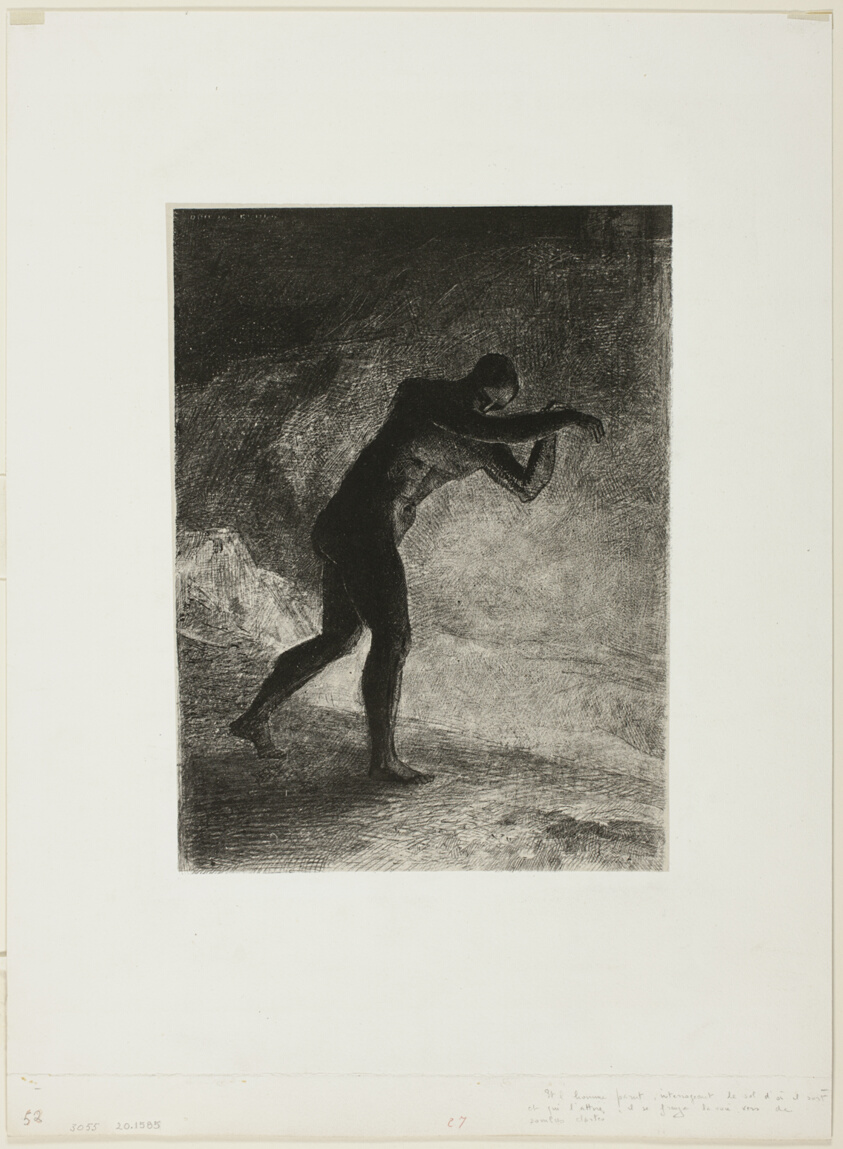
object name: Print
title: And Man Appeared; Questioning the Earth From Which He Emerged and Which Attracted Him, He Made His Way Toward Somber Brightness, plate 8 of 8 from "Les Origines"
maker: Odilon Redon (French, 1840-1916)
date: 1883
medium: Lithograph in black on light gray China paper, laid down on white wove paper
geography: France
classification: lithograph; print; prints and drawing; paper